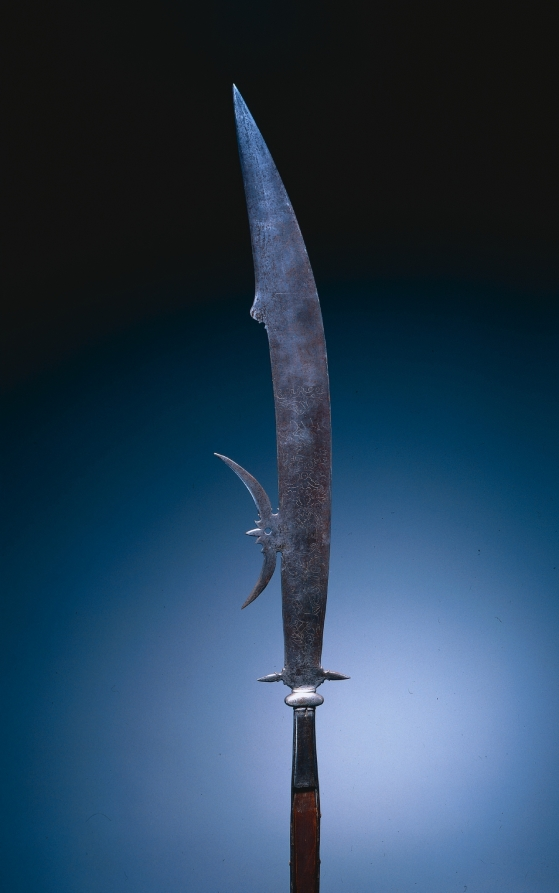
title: Glaive (with Arms of Giustini Family)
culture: Italy, Venice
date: c. 1600–1620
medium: steel, etched; wood haft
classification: Arms and Armor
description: A glaive is a long staff weapon with a large cleaver or knife-like blade. The flat steel blade is conducive to ornamental decoration such as heraldic devices. The decorative nature of this weapon made it a favorite for ceremonial use.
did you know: The large number of surviving glaives that are decorated with the arms of Venetian families indicate its popularity in the city of Venice.